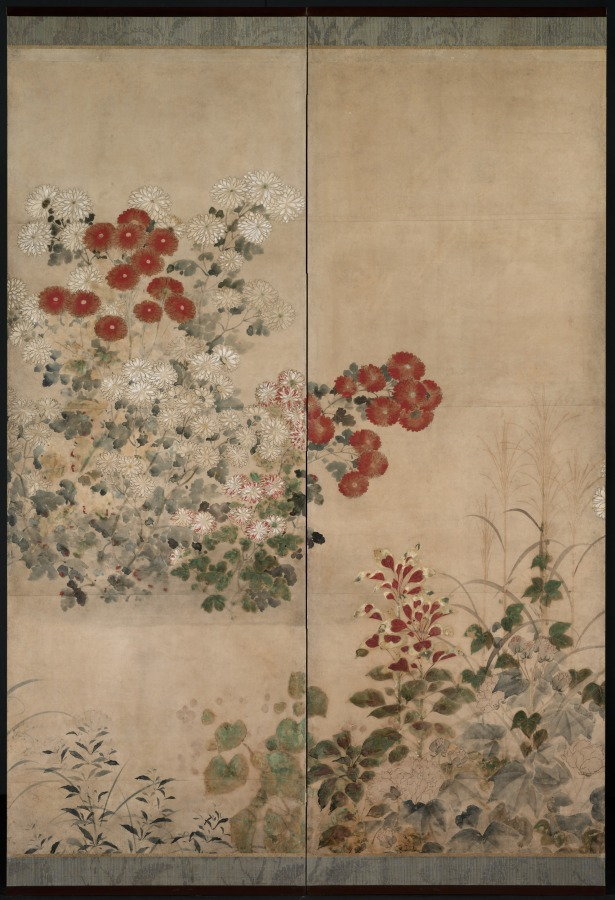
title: Flowers and Grasses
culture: Japan, Edo period (1615–1868)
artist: Kitagawa Sōsetsu (Japanese, active 1639–50)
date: mid-1600s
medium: pair of six-fold screens, ink and color on paper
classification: Painting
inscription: two seals, lower left: "I-nen; Sosetsu"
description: Kitagawa Sōsetsu painted for the Maeda family, powerful rulers of what is present-day Ishikawa Prefecture on the central northern coast of Honshū, Japan’s main island. Screens served as room dividers and backdrops in Maeda grand residences. This composition is considered one of the artist’s masterpieces. Kitagawa Sōsetsu is thought to have been a student of Tawaraya Sōsetsu, who was in turn the student of Tawaraya Sōtatsu, the Kyoto-based master painter regarded as the creator of the style that came to be known as Rinpa. By selecting a painter of this lineage, the Maeda family consciously connected their aesthetics to those of the imperial capital as a means of proclaiming their elevated status.